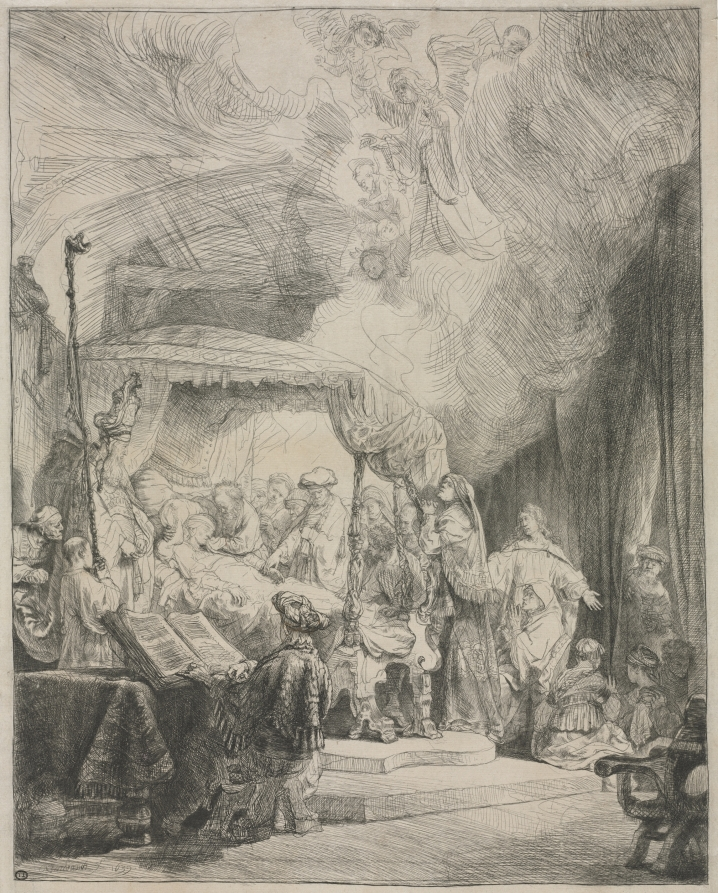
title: The Death of the Virgin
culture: Netherlands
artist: Rembrandt van Rijn (Dutch, 1606–1669)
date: 1639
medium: etching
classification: Print